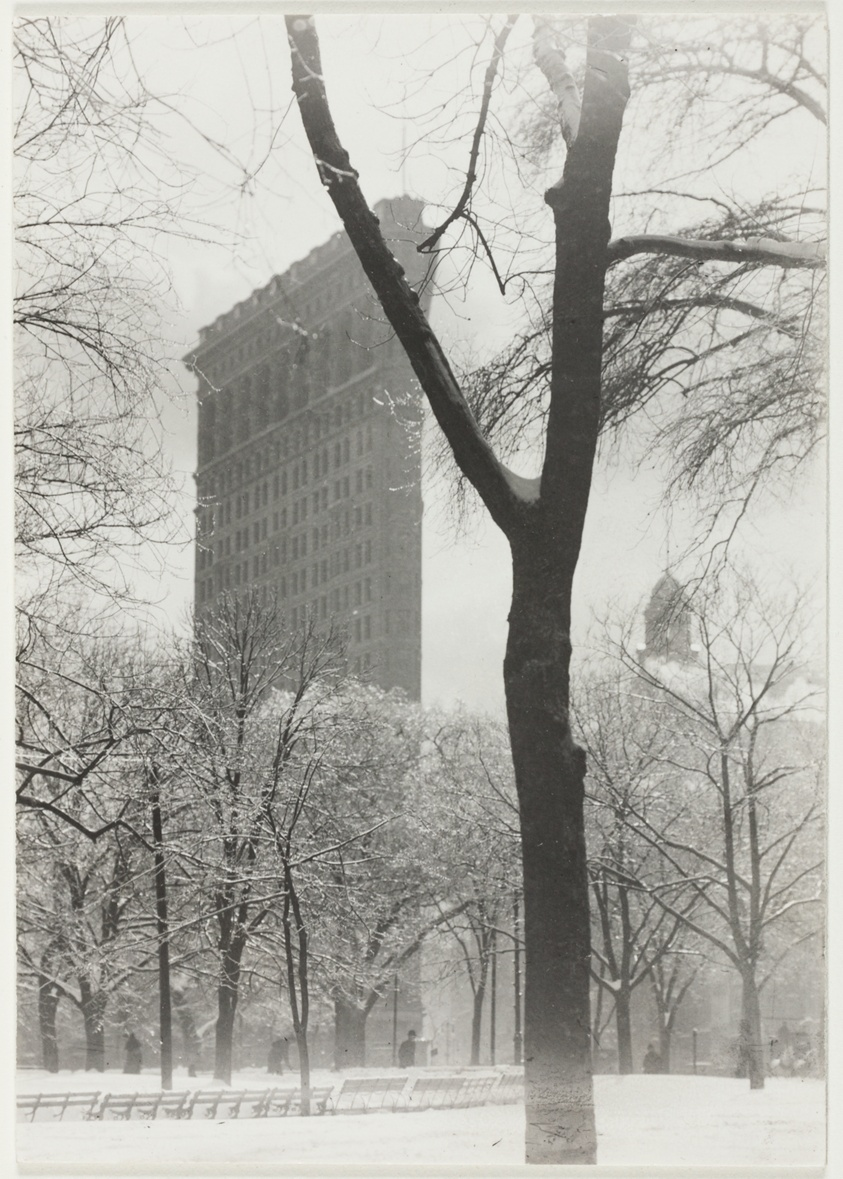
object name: Photograph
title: The Flatiron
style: Pictorialism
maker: Alfred Stieglitz (American, 1864–1946)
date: 1903, printed 1920/39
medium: Gelatin silver print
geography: United States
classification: gelatin silver (developing-out-paper) pr; photographic process; photography; photograph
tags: cityscapes